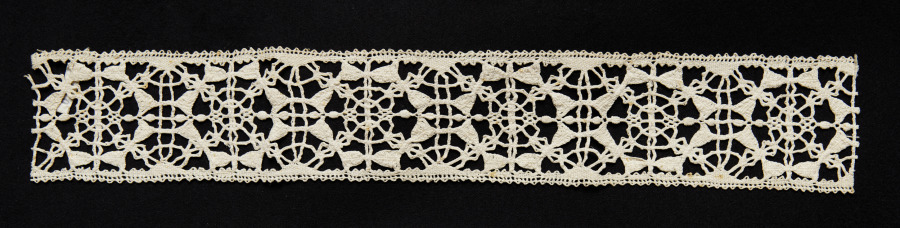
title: Lace Insertion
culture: Italy, Genoa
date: 1550–99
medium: Bobbin lace (needle lace, cutwork [punto tagliato] design)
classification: Lace